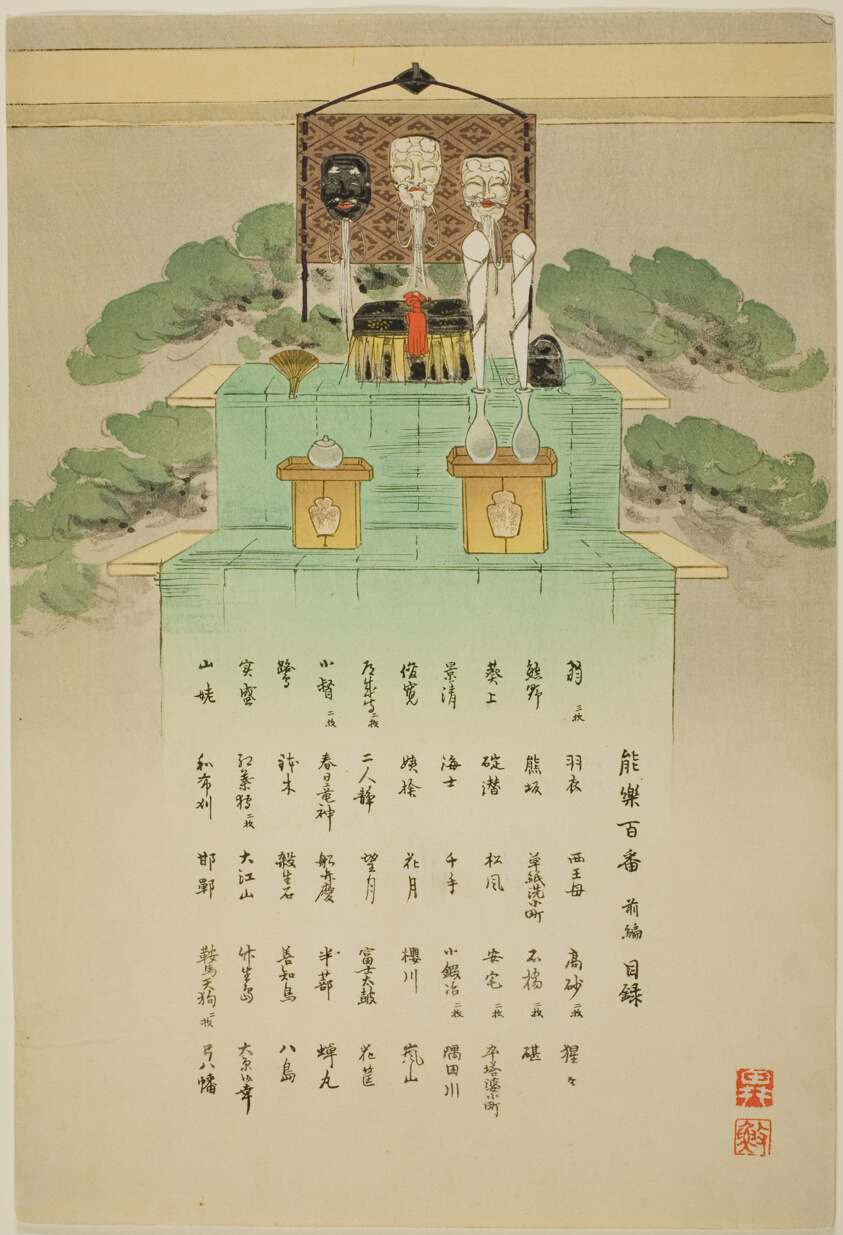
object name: Print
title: Index Sheet, from the series "One Hundred No Dramas (Nogaku hyakuban)"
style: Japanese (culture or style)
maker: Tsukioka Kogyo; Japanese, 1869-1927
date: 1898/1903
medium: Color woodblock print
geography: Japan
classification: woodblock print; print; asian art